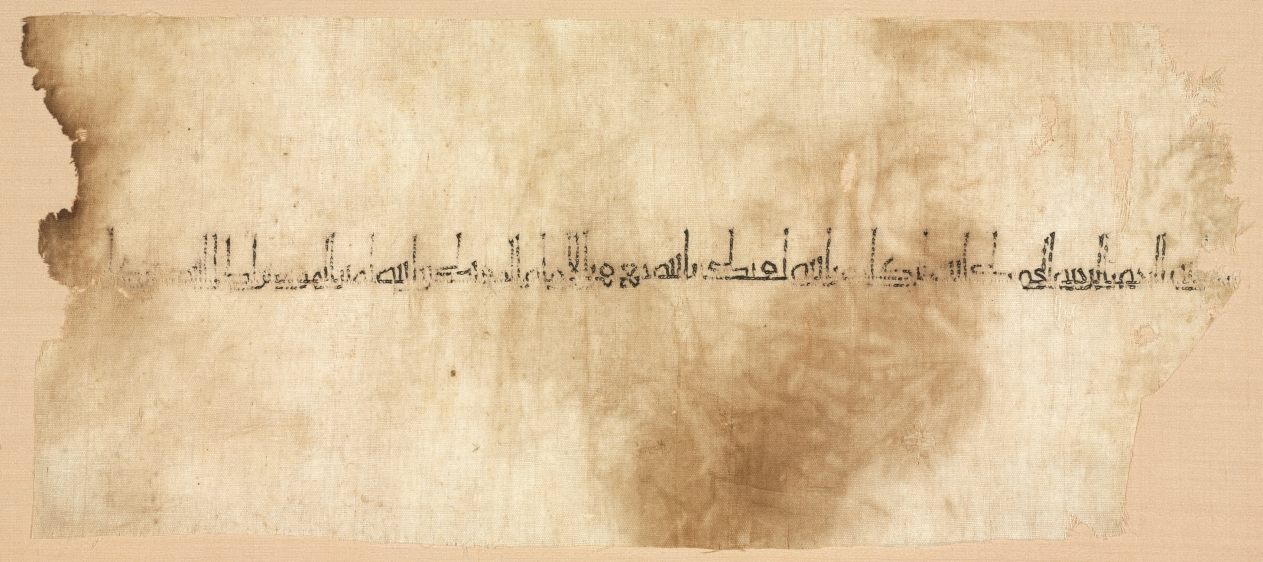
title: Fragment of a Tiraz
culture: Iran or Iraq, Eastern Caliphate, Baghdad or Bishapur, Abbasid period during the caliphate of al-Muqtadir, AH 306-311 (AD 918-924)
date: 918–924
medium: embroidery: silk on cotton tabby ground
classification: Embroidery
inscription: single line of Arabic text in Kufic letters: "[in the name of] God the Merciful, the Compassionate. Praise be God [sic for "to God"]. Blessing from God to the servant through [sic for "of"] God, Ja'far the iman al-Muqtadir bi-Allah, Commander of the Believers, may God pro[lo]ng . . . [B]lessing."